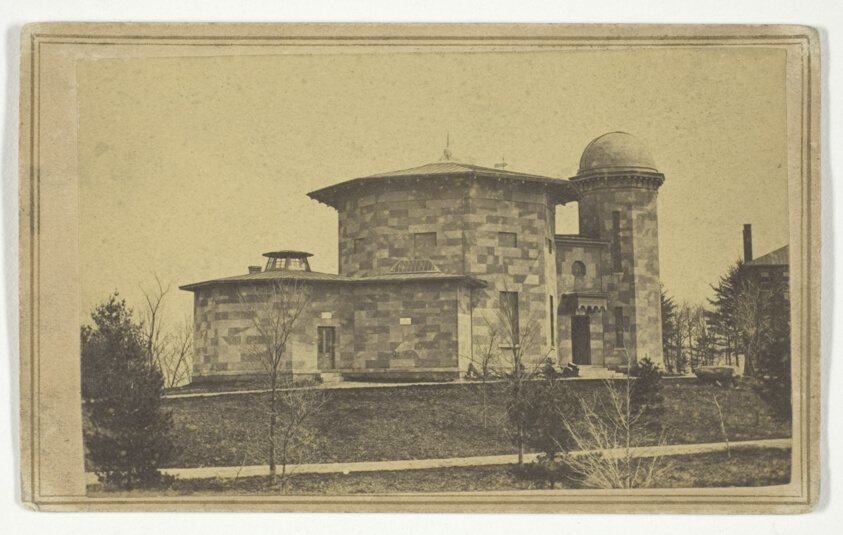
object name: Photograph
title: Woods Cabinet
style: 19th century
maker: J. L. Lovell (American, 1861–1904)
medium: Albumen print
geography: United States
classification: photographic process; photography; card photographs; photograph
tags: Collected by Hugh Edwards